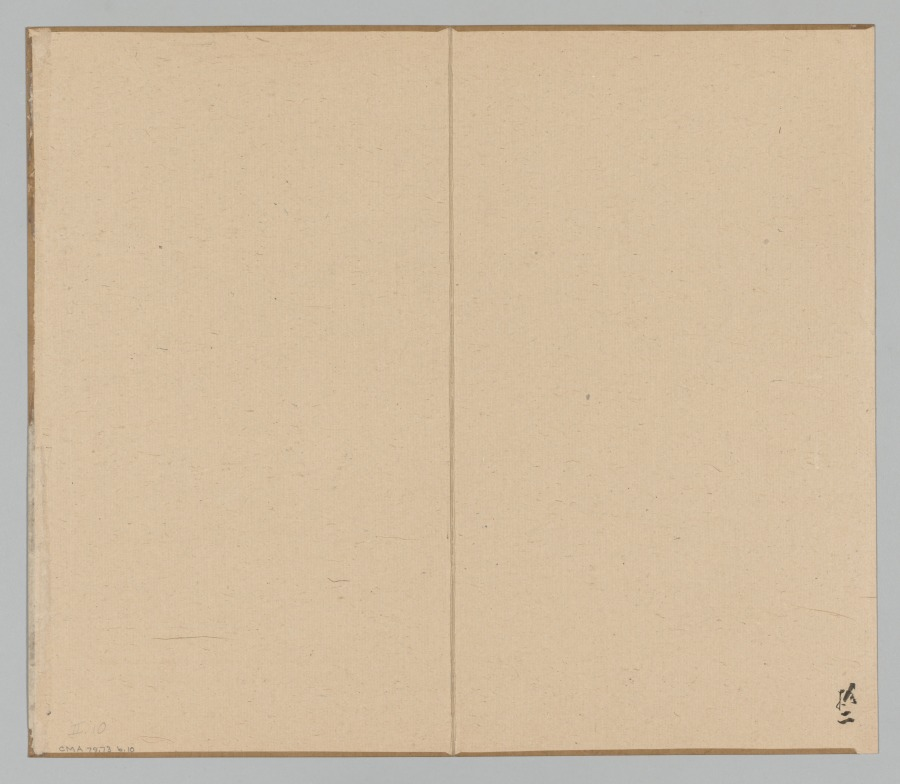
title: Reverberations of Taiga, Volume 2 (leaf 10)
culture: Japan, Edo period (1615–1868)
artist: Aoki Shukuya (Japanese, d. 1802)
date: mid- to late 1700s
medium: double-leaf from a pair of albums; ink and light color on paper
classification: Portfolio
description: Traditionally, young painters in Japan began their studies with an established master-painter. The master's compositions invariably became models that the apprentice copied to learn various ink and brush techniques. Shukuya was a pupil of the famous Kyoto artist Ikeno Taiga, whose style is reflected in these sketches of rocks, trees, and mountains.